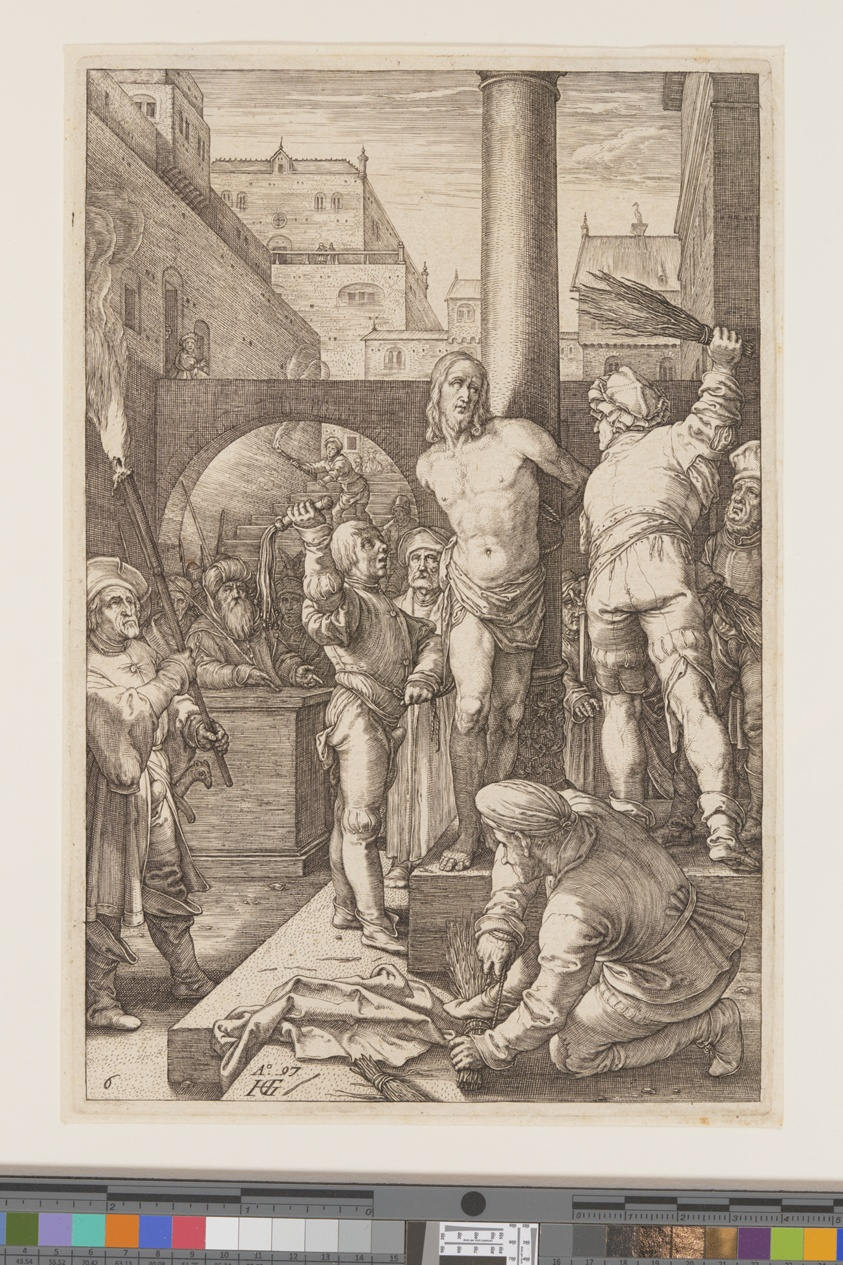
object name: Print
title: The Flagellation, from The Passion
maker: Hendrick Goltzius (Dutch, 1558–1617)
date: 1597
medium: Engraving on ivory laid paper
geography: Netherlands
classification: engraving; paper; print; prints and drawing